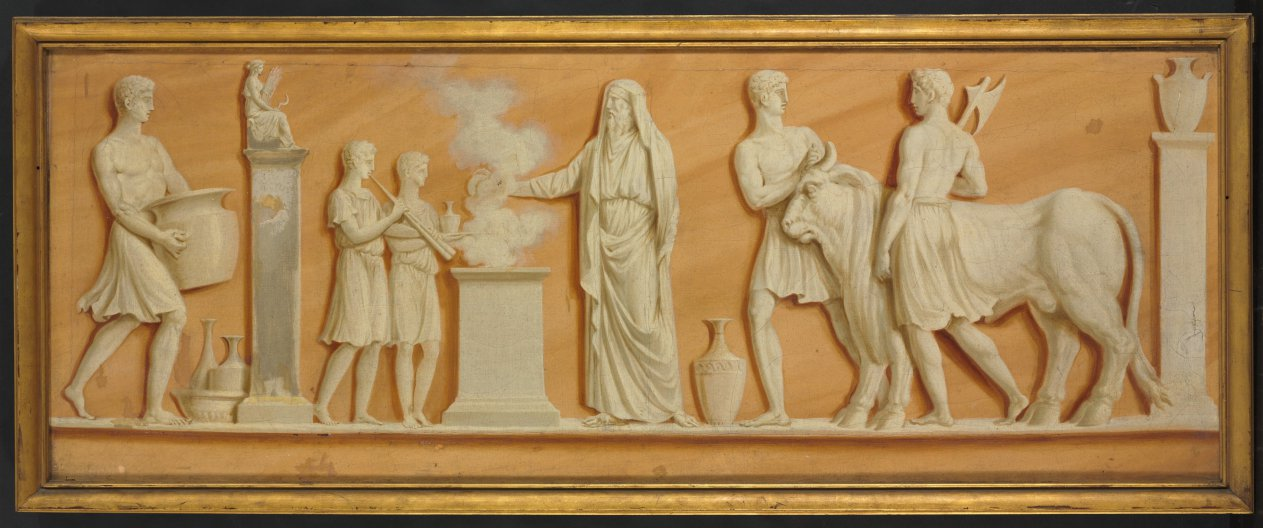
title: Overdoor Painting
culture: France, 18th century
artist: Pierre Rousseau (French, 1751–1829)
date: 1790s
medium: oil on canvas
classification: Painting